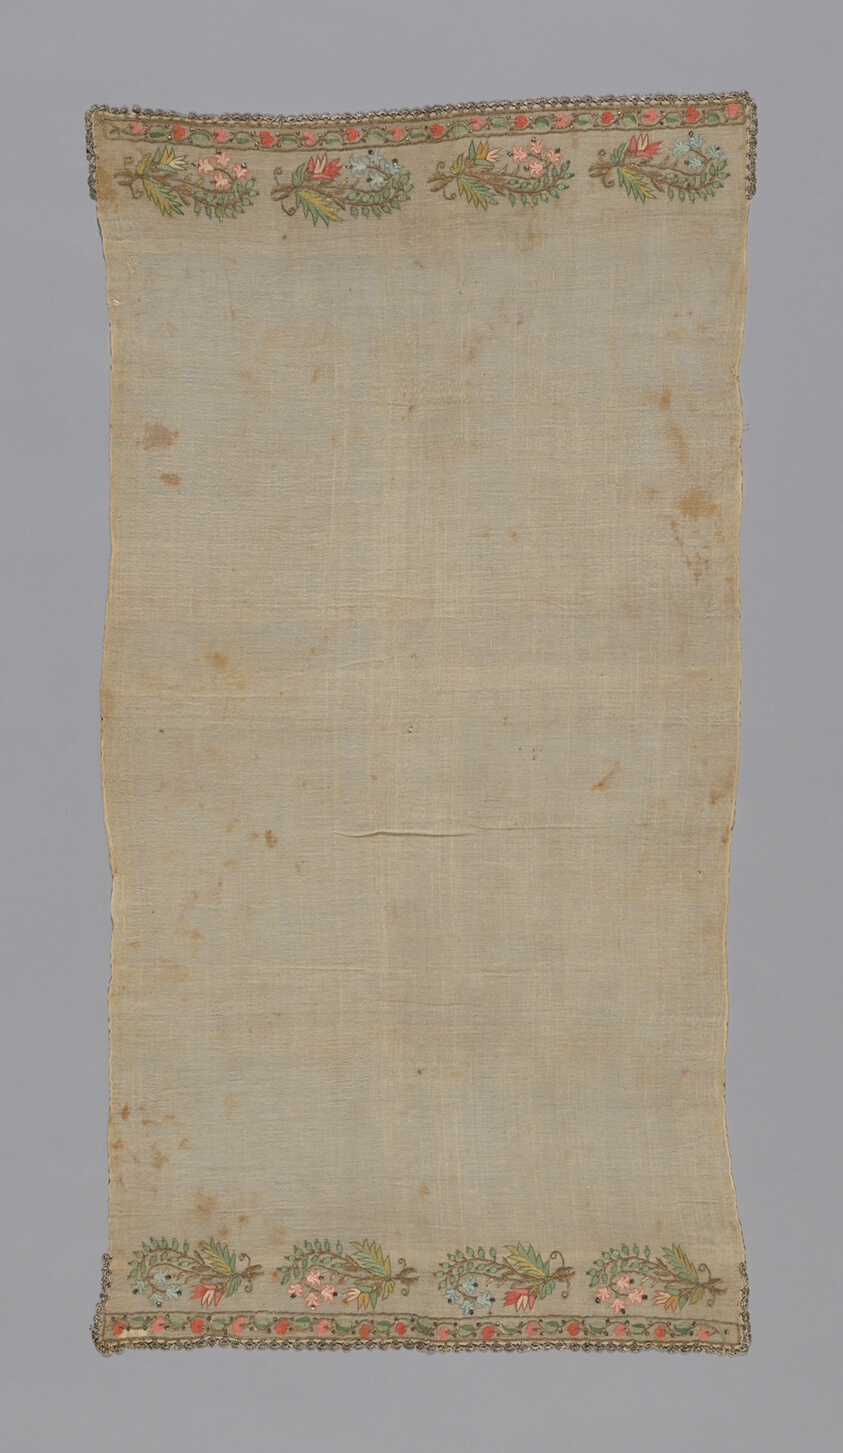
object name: Textile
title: Towel or Napkin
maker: Turkey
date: 19th century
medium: embroidered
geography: Turkey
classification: textile; needlework (visual works); weaving